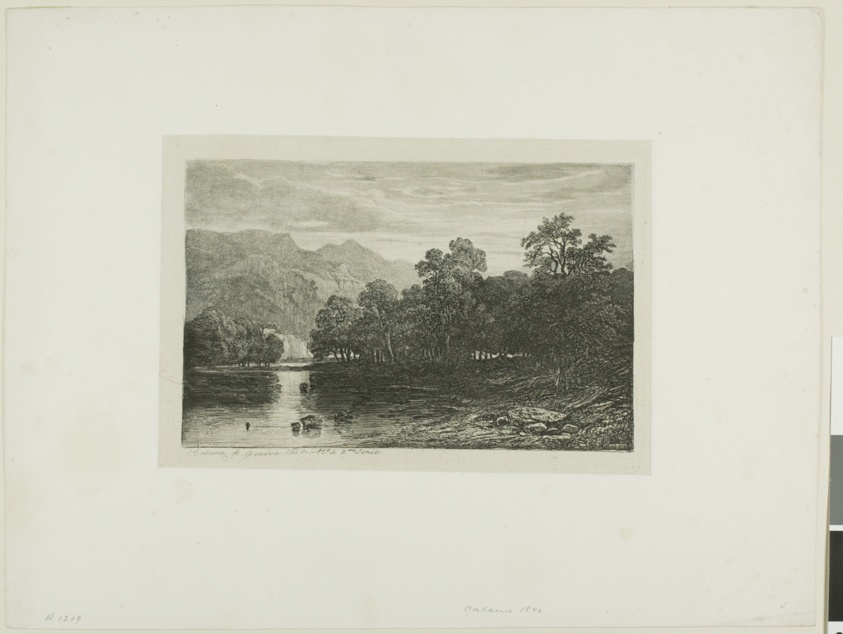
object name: Print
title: Alpine Landscape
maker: Alexandre Calame (Swiss, 1810-1864)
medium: Etching on paper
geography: Switzerland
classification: etching; print; prints and drawing